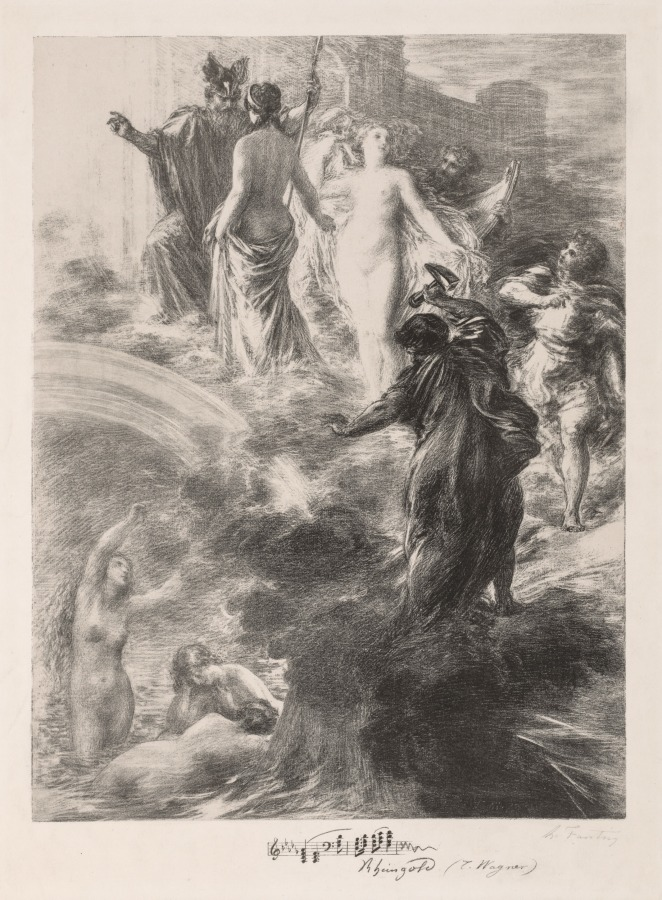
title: Finale of the Rhinegold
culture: France, 19th century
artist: Henri Fantin-Latour (French, 1836–1904)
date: 1877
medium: lithograph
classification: Print